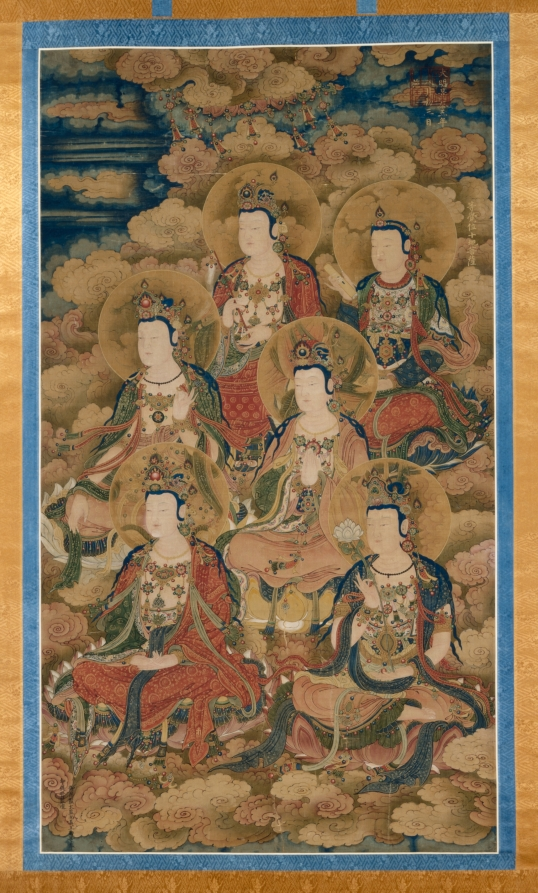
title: The Bodhisattvas of the Ten Stages in Attaining the Most Perfect Knowledge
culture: China, Ming dynasty (1368–1644)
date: 1454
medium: hanging scroll; ink and color on silk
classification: Painting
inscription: 大明景泰五年八月初三日施 [印] 廣運之寳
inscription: 御用監太監尚義王勤等奉命提督監造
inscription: 等覺位十地菩薩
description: This painting represents bodhisattvas of the 10 stages of enlightenment undergoing the final processes toward Buddhahood. This and CMA 1973.70.2 form part of a set of scrolls that were used to perform the Water-Land (shuilu) ritual. The sinuous curves of scarf and drapery, the layering of garments, and the minute detail all reflect the opulent visual atmosphere that surrounded the Ming worshipper in temples and spirit halls throughout the country. In the upper right corner of each painting is an imperial seal and an inscription in gold: Donated on the third day of the eighth month in the fifth year of the Jingtai reign (1454) of the Great Ming. Written in ink in the lower left corner is the record that they were made on imperial order, probably to present them to the Da Longfu monastery in Beijing.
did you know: This painting was used in the grandest of the Buddhist mortuary rites, the Water-Land (shuilu) ritual, which was conducted for the salvation of “all souls of the dead on land and sea.”